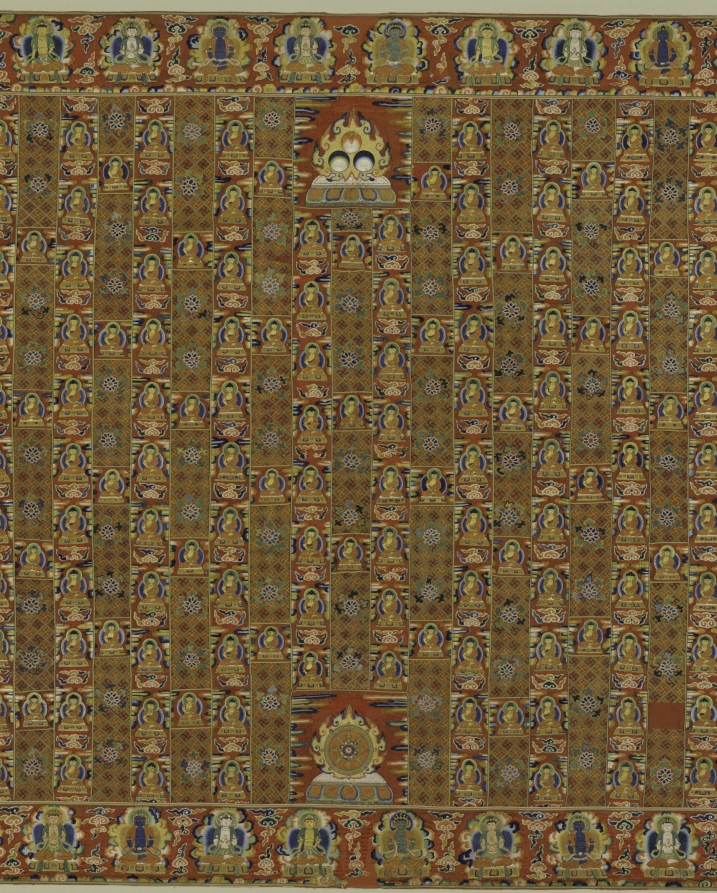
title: Buddhist Priest's Ceremonial Robe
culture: China, Ming dynasty (1368–1644)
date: 1400s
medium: silk and gold thread; embroidery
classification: Garment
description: This example of imperial embroidery is one of the earliest surviving Chinese Buddhist robes (kasaya) in the West. Depicting 991 Buddhas, each slightly different, it is constructed out of patches in reference to the legend in which the Buddha's favorite disciple divided a robe he was given into 30 pieces. Patchwork is also a sign of humility. Multiple Buddha images known as “thousand Buddha” designs are seen painted and sculpted on the walls of cave temples in India, Afghanistan, Central Asia, and China, but are rare on garments. The Four Heavenly Kings, guardians of the four directions, occupy the textile’s corners. When draped around the body, the inverted figures in the upper left corner appear right side up. Robes with 25 columns were worn by the highest-ranking clergy on ceremonial occasions.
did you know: The Five Transcendent Buddhas, who symbolize the purity of the five elements, are repeated around the edges.